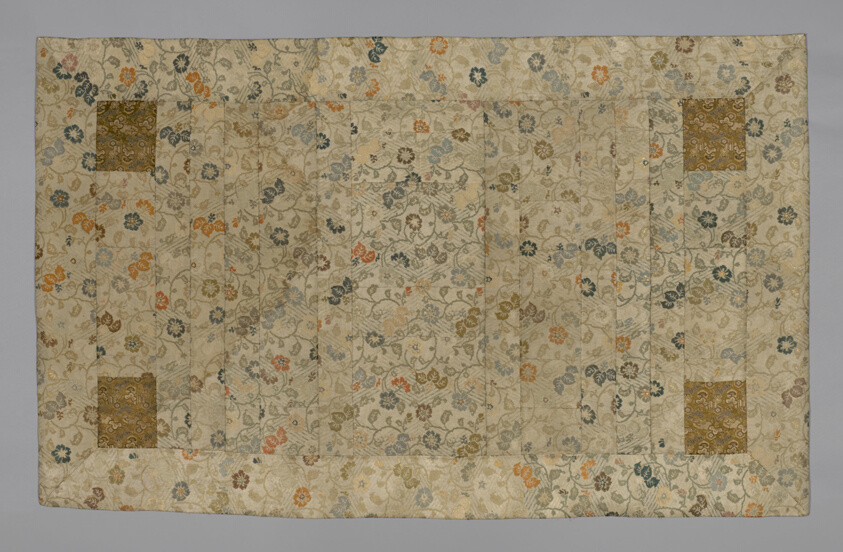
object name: Textile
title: Kesa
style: meiji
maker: Japan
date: Meiji period (1868–1912), 1868/1900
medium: Hiri, yô, jô: silk and gold-leaf-over-lacquered-paper strip, warp-float faced 2:1 ‘Z’ twill weave with weft-float faced 1:2 ‘Z’ twill interlacings of secondary binding warps and supplementary patterning wefts; shiten: silk and wild silk, warp-float faced 4:1 satin weave with plain interlacings of secondary binding warps and supplementary patterning wefts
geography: Japan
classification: textile; weaving; liturgical - buddhist